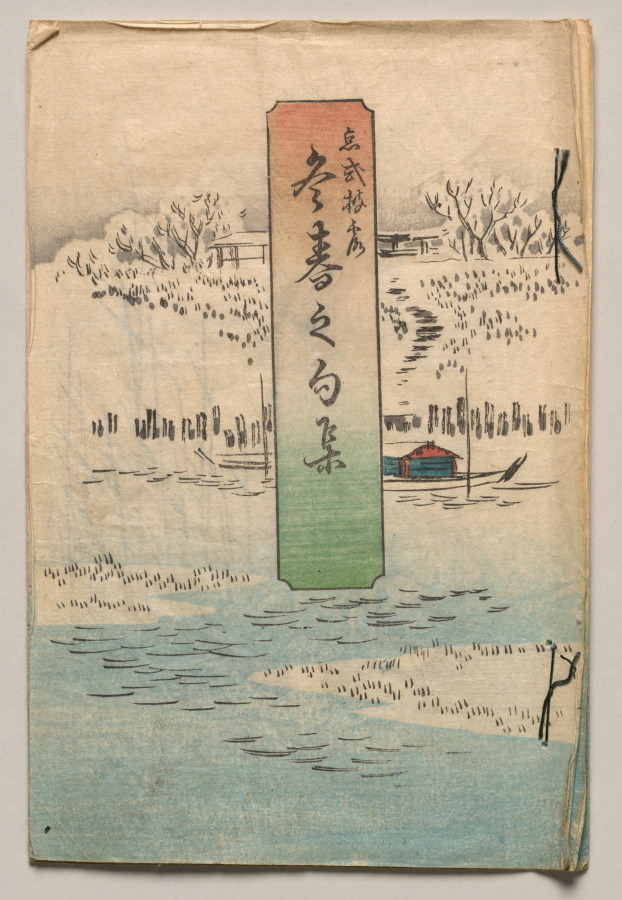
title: Verses for Winter and Spring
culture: Japan, Edo period (1615–1868)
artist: Utagawa Hiroshige (Japanese, 1797–1858)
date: 1850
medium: Woodblock printed book; ink and color on paper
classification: Bound Volume